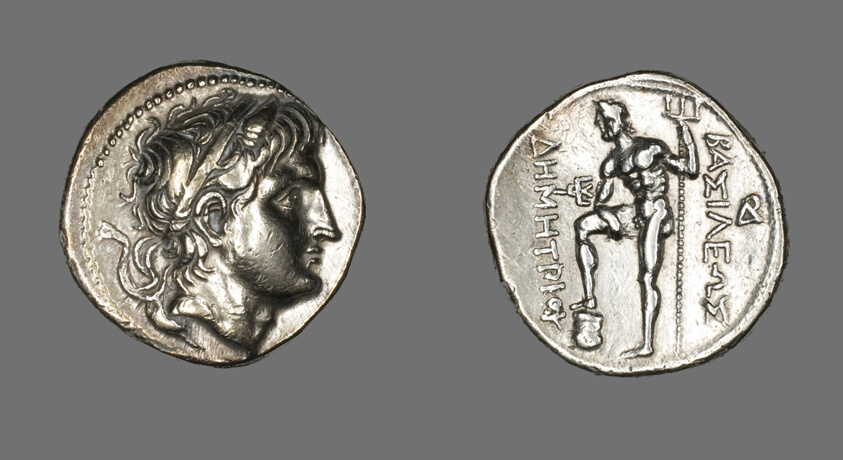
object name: Coin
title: Tetradrachm (Coin) Portraying Demetrios I of Macedonia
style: hellenistic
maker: Greek; minted in Amphipolis, Macedonia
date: 289-288 BCE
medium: Silver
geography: Macedonia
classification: coin; ancient art